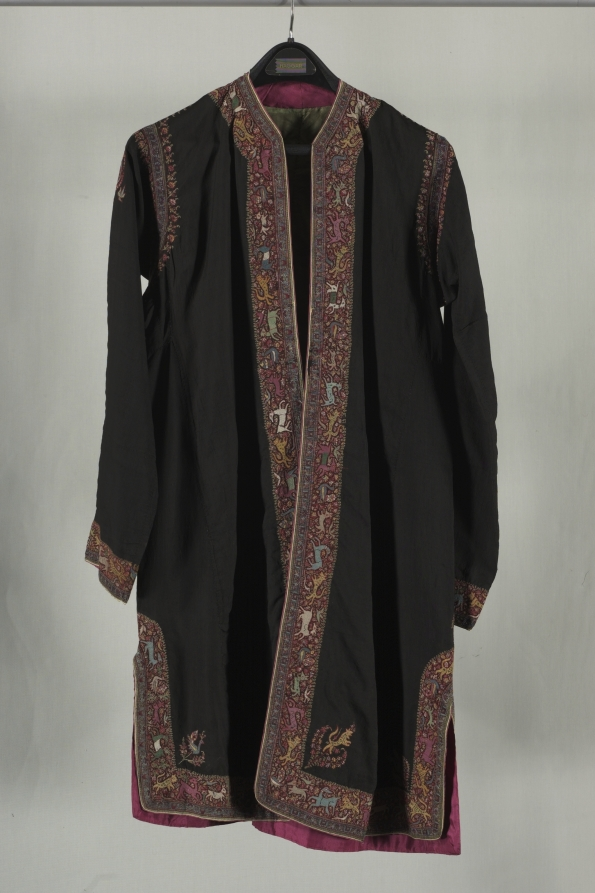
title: Jacket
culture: India, Kashmir, Late 19th century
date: c. 1875–1900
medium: black wool with embroidery, green silk lining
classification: Garment